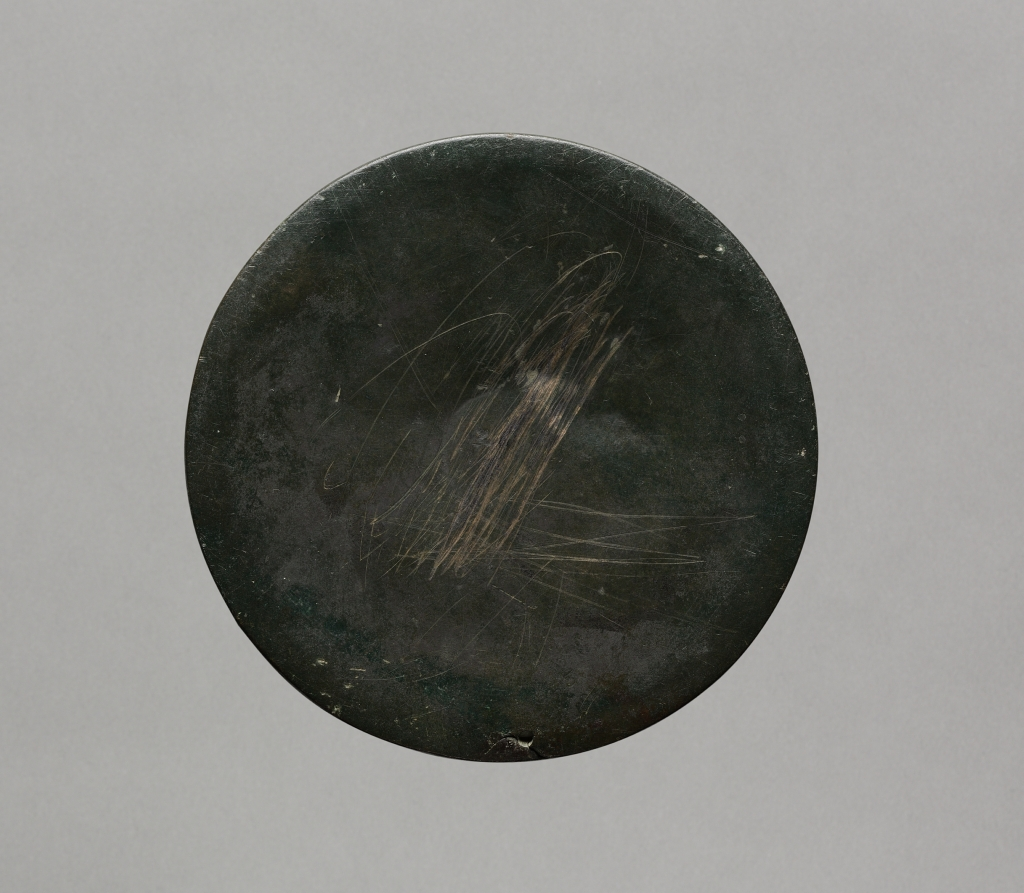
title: Mirror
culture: Japan, Heian period (794–1185)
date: 794–1185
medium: bronze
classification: Metalwork